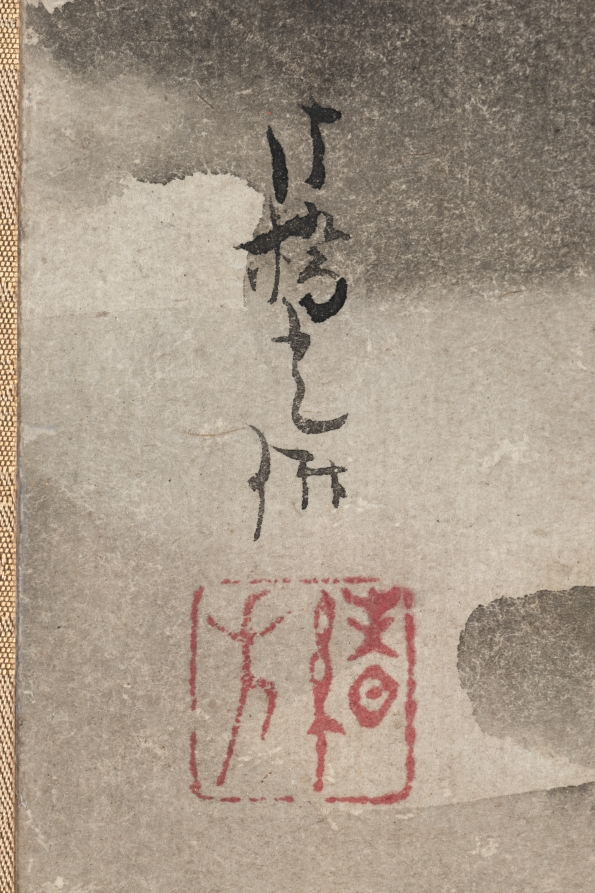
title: Pheasant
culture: Japan, Edo period (1615–1868)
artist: Ogata Kōrin (Japanese, 1658–1716)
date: 1658–1716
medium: hanging scroll; ink and color on silk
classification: Painting